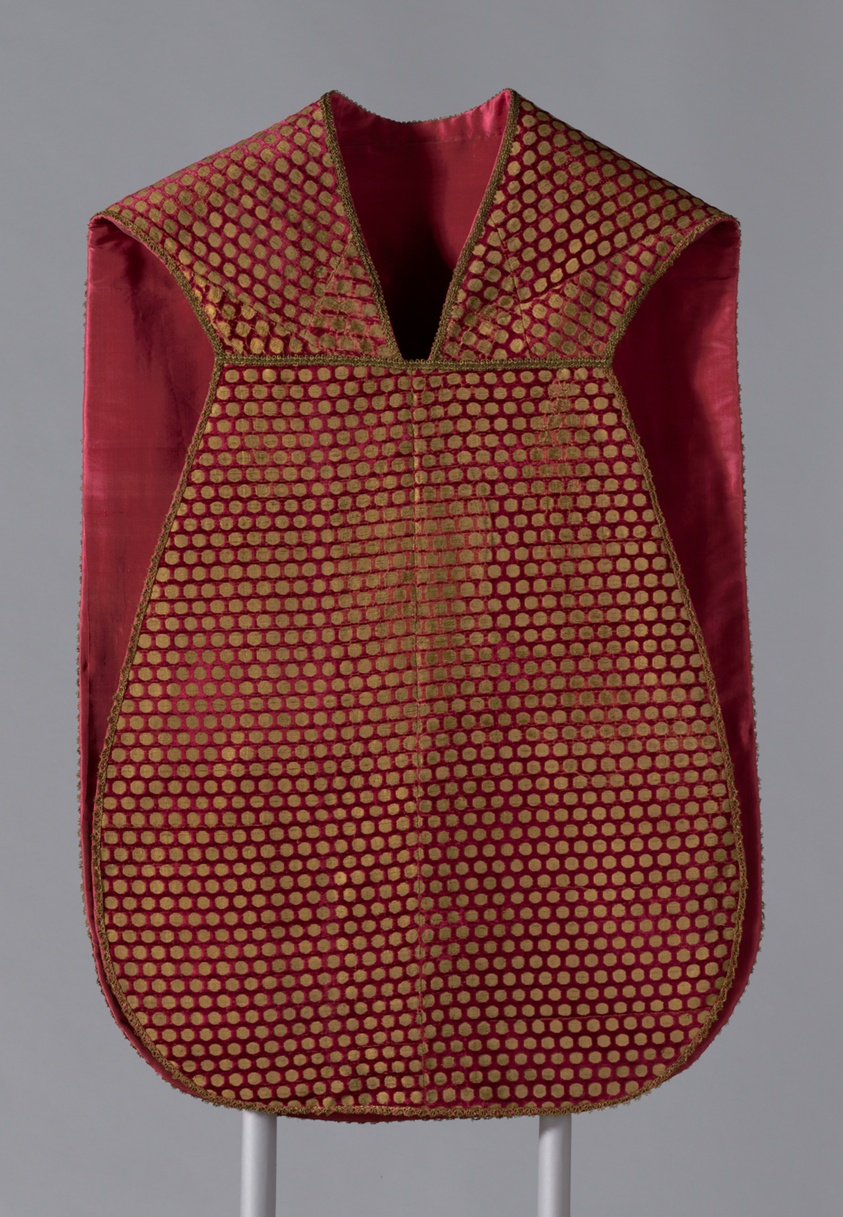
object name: Textile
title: Chasuble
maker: Iran (Persia, Tabriz)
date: Late 13th/14th century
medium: Silk, plain weave with twill interlacings of secondary binding warps and gilt-animal-substrate-wrapped silk supplementary facing wefts; supplementary pile warps forming cut voided velvet; edged with gilt-metal-strip-wrapped silk, bobbin-made tape; lined with silk, plain weave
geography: Tabriz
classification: textile; weaving - velvet; weaving; liturgical